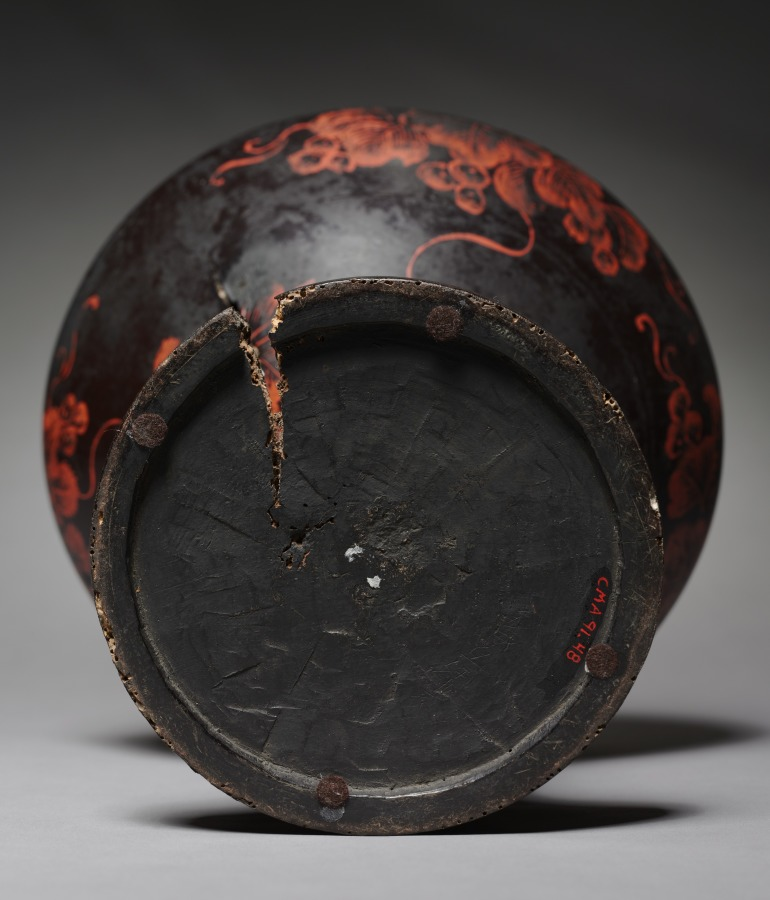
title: Sake Flask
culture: Japan, Muromachi period (1392–1573)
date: 1500s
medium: Black laquered wood with red lacquer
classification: Lacquer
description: This flask contained rice wine, or sake. Its wood body was shaped by a lathe before black lacquer was applied to the surface. A red lacquer design of grapevines, an auspicious motif, covers the surface. With their numerous, long-lasting fruits, grapevines traditionally symbolized fertility and longevity in East Asia.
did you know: The evocative imagery of brushed leaves and bunches of grapes suggest that the artist referred to a particular painting when decorating this vase.